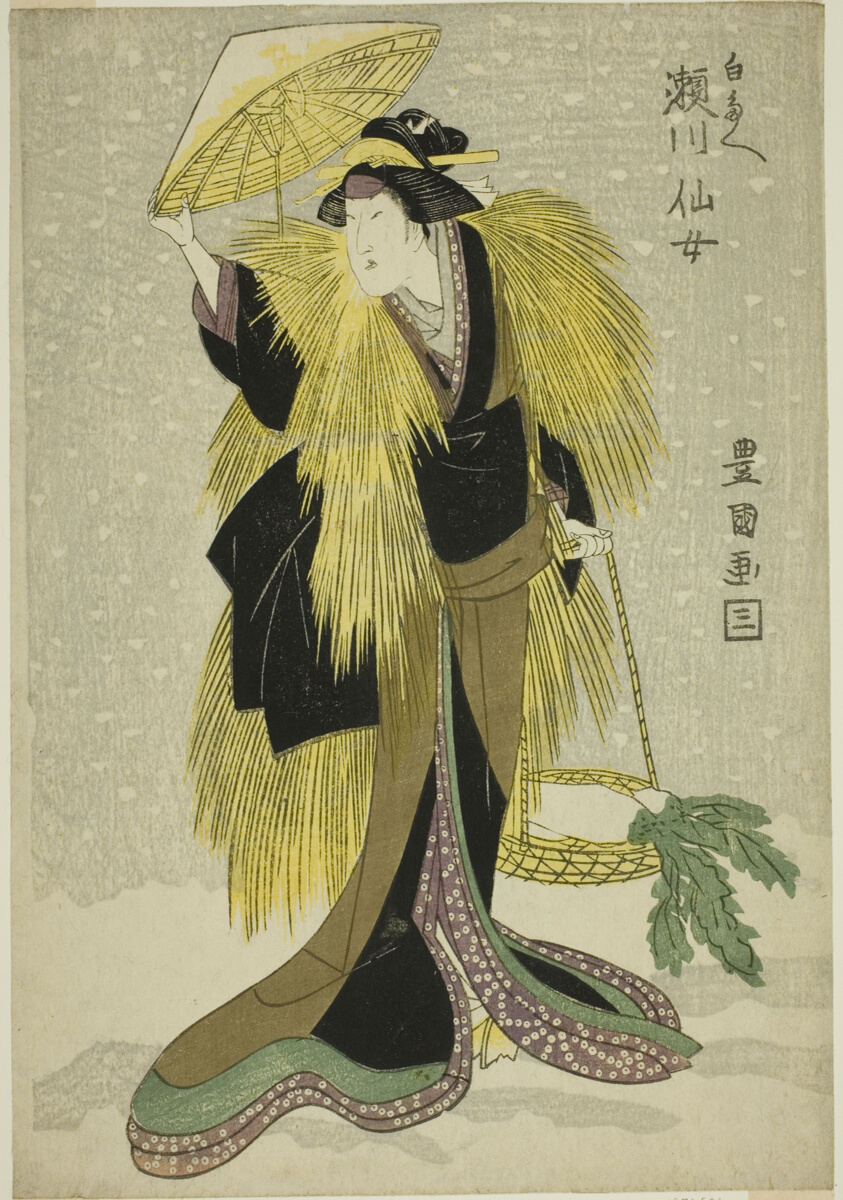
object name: Print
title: The actor Segawa Senjo as Shirotae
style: Japanese (culture or style)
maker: Utagawa Toyokuni I 初代 歌川 豊国; Japanese, 1769–1825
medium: Color woodblock print; oban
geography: Japan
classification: woodblock print; print; asian art